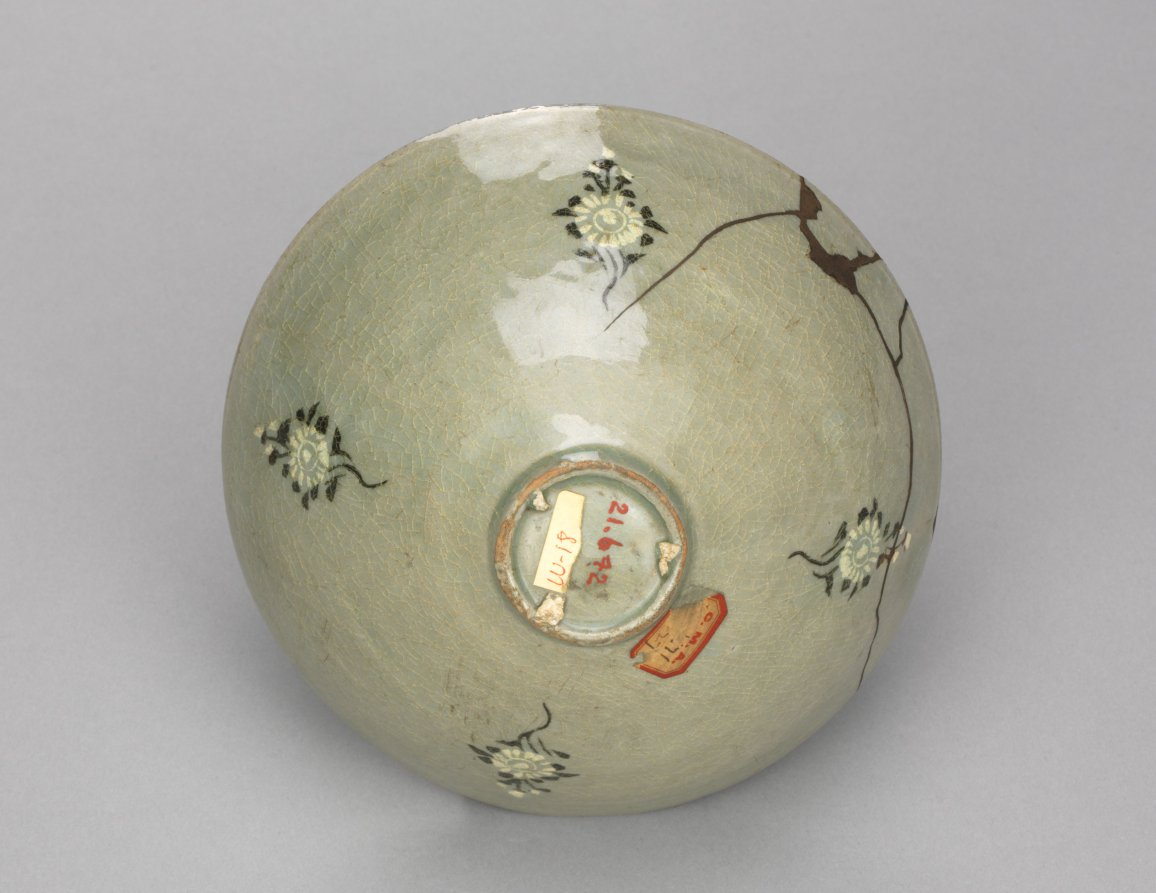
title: Bowl with Fish and Waves in Relief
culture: Korea, Goryeo dynasty (918–1392)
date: 1200s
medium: pottery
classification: Ceramic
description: As early as the 800s, the practice of drinking tea and wine became an important part of elite leisure culture in Korea. A wide bowl like this example was especially suitable for drinking powdered tea shaved from a compressed tea cake, the most commonly enjoyed type during the Goryeo period. While the inlaid image of bloomed chrysanthemums decorate the outer wall, that of fish swimming in waves in relief appear on the inner wall of this tea bowl. Such elaborate design tells us that tea wares then were aesthetically invested objects of luxury.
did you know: Kangjin and Buan kilns in Jeolla province were the two major production centers for celadon wares during the Goryeo period (918–1392).